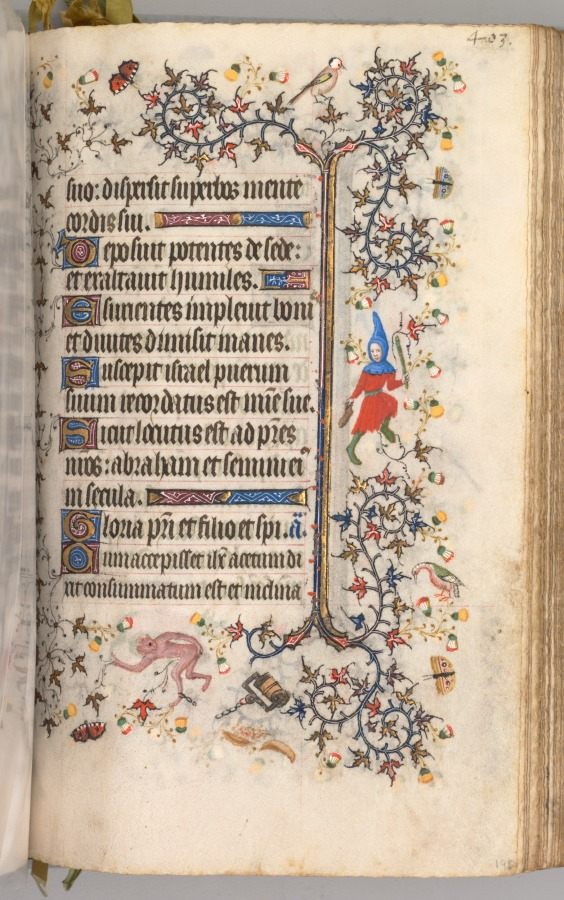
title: Hours of Charles the Noble, King of Navarre (1361-1425): fol. 196r, Text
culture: France, Paris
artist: Master of the Brussels Initials and Associates (French)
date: c. 1405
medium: ink, tempera, and gold on vellum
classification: Bound Volume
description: This precious volume was obviously highly prized by its owner, the French-born King of Navarre, who had his coat of arms painted on no less than twenty folios. Rather than directly commissioning this manuscript from a specific workshop, it seems that Charles the Noble acquired his book of hours -- perhaps ready-made for the luxury market -- while on a trip to Paris in 1404-05. A collaborative effort, six painting styles are evidenced within the pages of this codex, those of two Italians, two Frenchmen, and two Netherlanders. The painter who was responsible for the planning and decoration of the book, and who produced seventeen of the large miniatures, was a Bolognese artist known as the Master of the Brussels Initials. His principal assistant, responsible for most of the borders, was a Florentine who signed his name "Zecho" da Firenze on folio 208 verso.